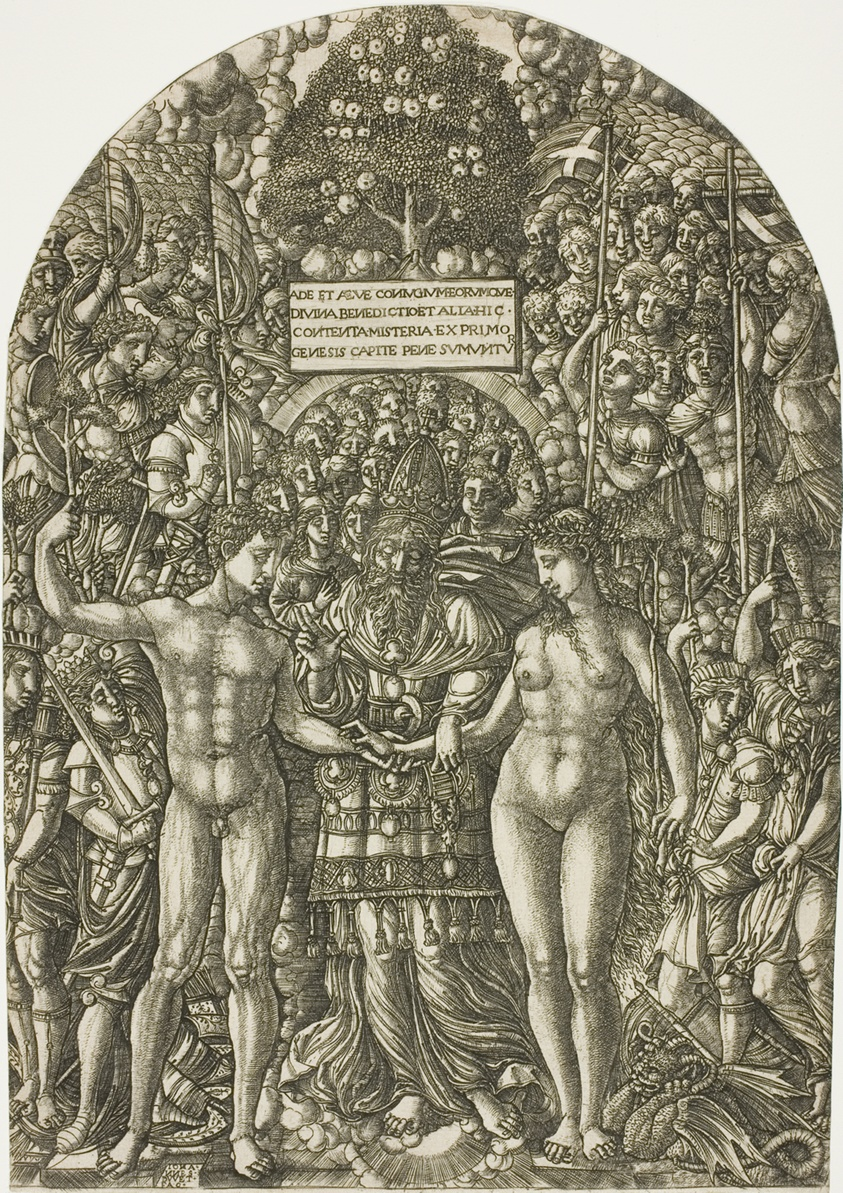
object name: Print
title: Marriage of Adam and Eve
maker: Jean Duvet (French, 1485-after 1561)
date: 1540/55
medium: Engraving in black on paper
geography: France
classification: engraving; print; prints and drawing